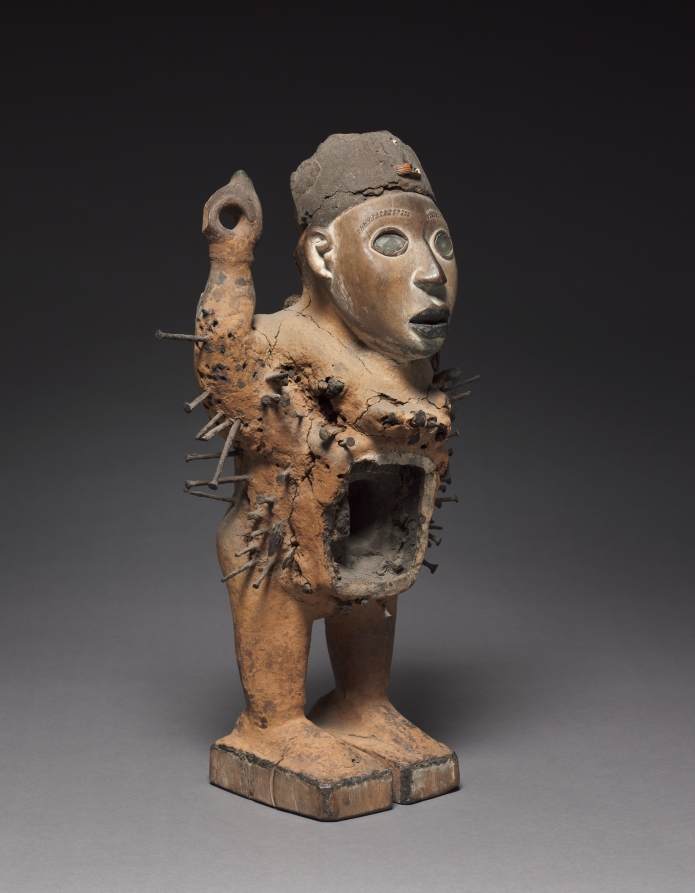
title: Male figure (nkisi nkondi)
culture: Democratic Republic of Congo or Cabinda (Angola), Kongo artist and nganga (priest)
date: late 1800s-early 1900s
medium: Wood, metalized glass, iron, organic material, ivory or plastic, and natural fiber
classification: Sculpture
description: This nkisi nkondi (power figure) lacks most of the materials that transformed it into a vessel for a spirit. Carved by sculptors, minkisi hosted spirits after banganga (priests) placed substances inside to empower them. The mirrored eyes, resin cap, and stomach chamber once contained empowering materials. After the nkisi had served its purpose the nganga removed the materials, stripping it of its spiritual power; the remaining sculpture was discarded. Sometimes, Kongo people removed materials as acts of anti-colonial resistance, disempowering minkisi before Europeans seized them. While we don’t know why it was disempowered, this sculpture is no longer spiritually active.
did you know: A mix of locally made and imported metal nails, blades, and screws cover this figure.